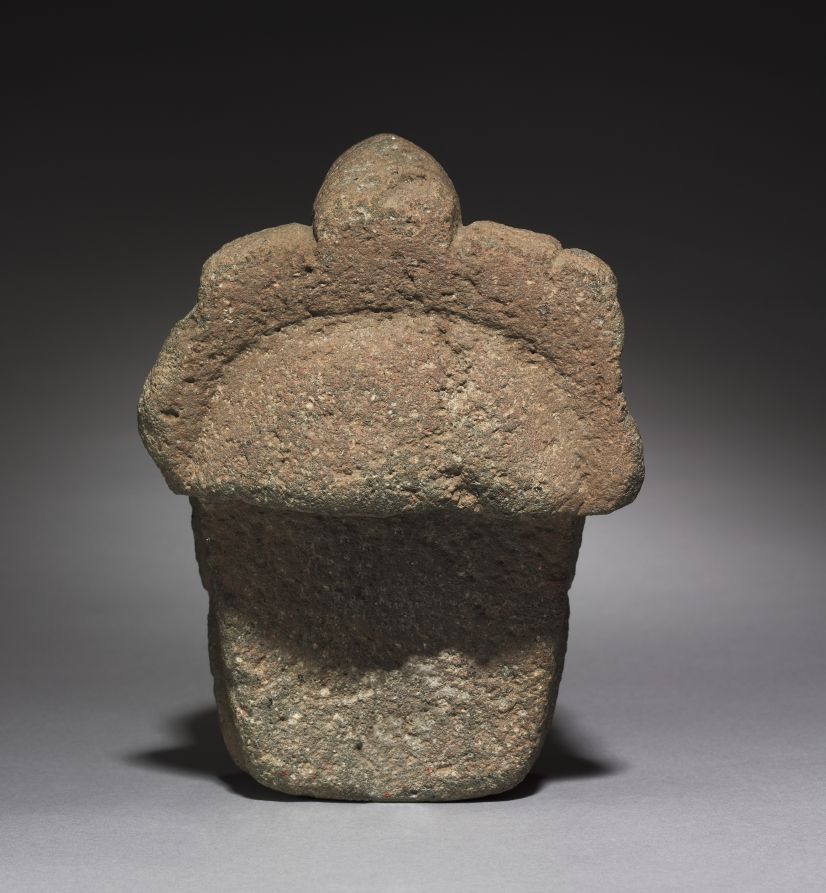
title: Ballgame Stone Head (Hacha)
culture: Mesoamerica, Classic Veracruz style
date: 450–550 CE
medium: gray volcanic stone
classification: Sculpture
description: Little can be said about this head’s identity and meaning, although the deep, dramatic furrows that line the face suggest age and the crest that curves across the top of the head has been compared to that of a bird. Such heads were one element of the regalia used in an ancient ballgame associated with complex mythology and equally elaborate art production on Mexico’s Gulf Coast, in present-day Veracruz.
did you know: This head’s identity is unknown but the deep furrows on the face suggest age.